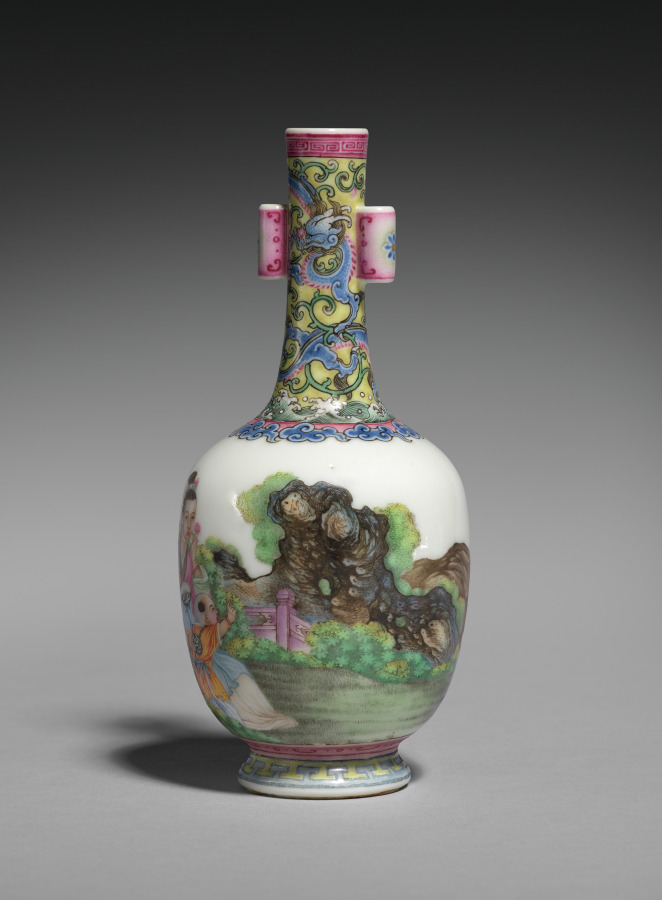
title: Vase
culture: China, Qing dynasty (1644-1911), Qianlong mark and reign (1736-95)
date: 1736–95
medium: Porcelain with decoration in colored fa-lang enamels, Guyuexuan ware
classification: Ceramic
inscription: 乾隆年製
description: The four-character mark on the base of this vase indicates that it was made in Jingdezhen and then sent to Beijing to be decorated in the imperial workshops by painters who were trained in using Western perspective and shading.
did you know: The child in orange has a bun above his ear, while the rest of his head is clean-shaven, like the other children’s.